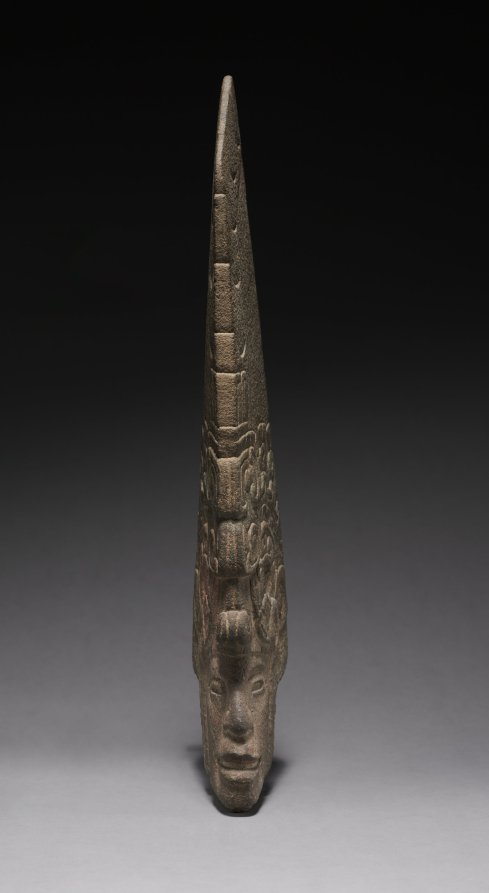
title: Ballgame Thin Stone Head (Hacha)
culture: Mexico, Gulf Coast, Classic Veracruz style (600-1100)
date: 600–900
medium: stone, pigment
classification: Sculpture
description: A tapering headdress, its base formed by a grotesque head with upturned snout, soars above a human face in this elegant thin stone head. Such heads, known as hachas, probably were used in ballgame ceremonies, though how is unclear. Equally obscure are the heads’ identities, perhaps heroic, idealized players, ballgame patrons, or characters from the game’s lore. The large area of red pigment on one side may have been sprinkled onto the head after it was buried in an offering or a tomb.